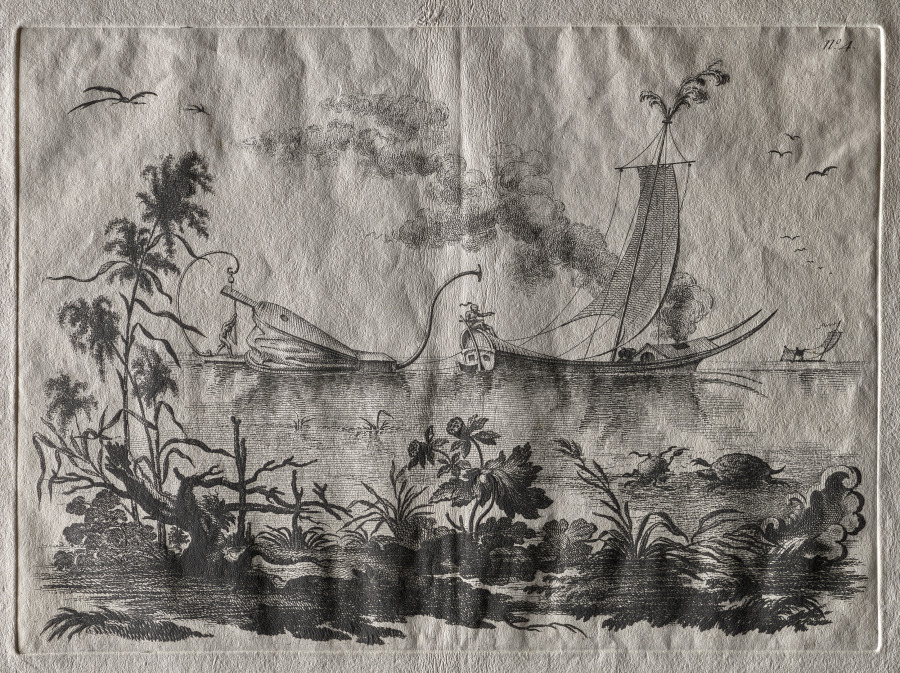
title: The Manner of sailing by the power of Bellows practiced on that Planet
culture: Italy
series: Suite of the Most Notable Things Seen by John Wilkins Erudite English Bishop during his Famous Voyage from the Earth to the Moon … dedicated to Sir William Hamilton ambassador to the Court of Naples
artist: Filippo Morghen (Italian, 1730–after 1807)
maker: possibly after Jean-Pierre-Louis-Laurent Hoüel (French, 1735–1813)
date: c. 1769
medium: etching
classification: Print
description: Filippo Morghen’s set of 10 etchings is outstanding among visual narratives of imaginary voyages to the moon, both visual and literary, that intrigued 18th-century European audiences. A title page and nine plates depict the imagined lives and economy of moon dwellers. These include modes of transport such as large birds and sailboats propelled by giant bellows, enormous scissors for capturing wild beasts (including an oversized rat), and the use of giant pumpkins as fishing boats and as dwellings. Representations of the moon dwellers are based on inaccurate and imaginary European interpretations of Asian, Ottoman, and Native American cultures—called chinoiserie and turquerie—that permeated the decorative and visual arts of the period.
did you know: Morghen based this print series on three books dedicated to moon exploration, including Bishop Francis Godwin’s, Man in the Moone, 1640.